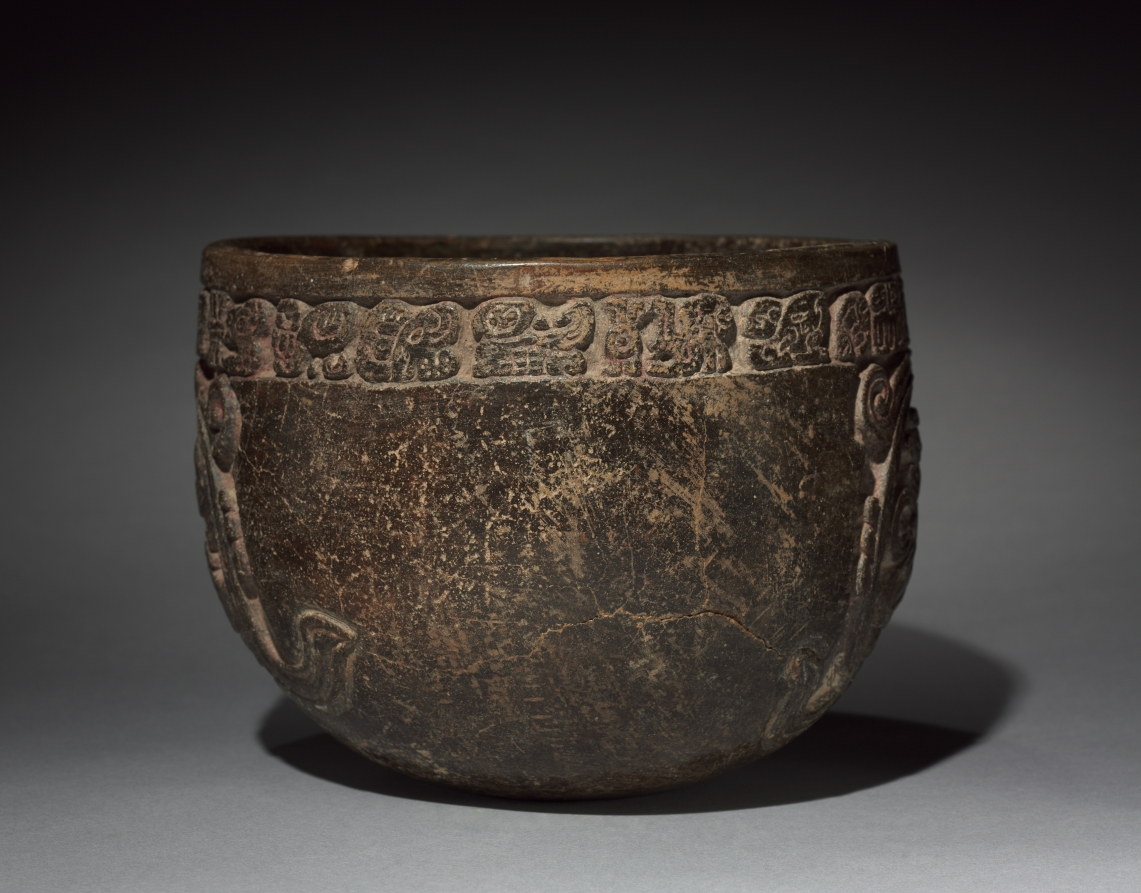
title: Carved Vessel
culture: Mexico, Campeche, Maya, Chocholá Style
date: c. 600–1000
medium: earthenware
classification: Ceramic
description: A firefly is carved on both sides of this Maya vessel, which is from the Yucatán Peninsula. Among the most common of insects to appear in Maya art, the firefly seems to be associated with things that twinkle in the dark—stars and cigars, the latter a symbol that identifies creatures of the night.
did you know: The text on the rim mentions a young man, suggesting this vessel was involved in a rite-of-passage ceremony.